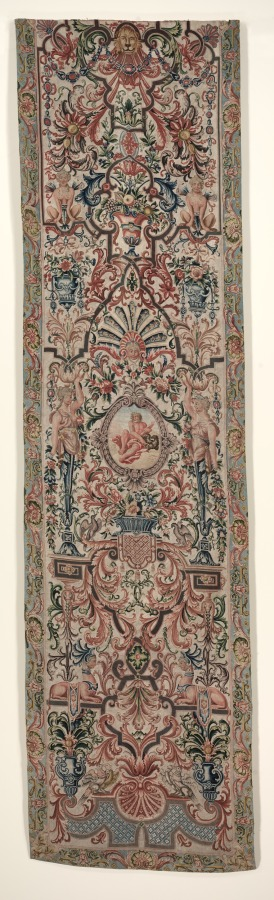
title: Pair of Needlework Bed Hangings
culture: France, late 17th century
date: c. 1690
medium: petit point embroidery; silk and wool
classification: Embroidery